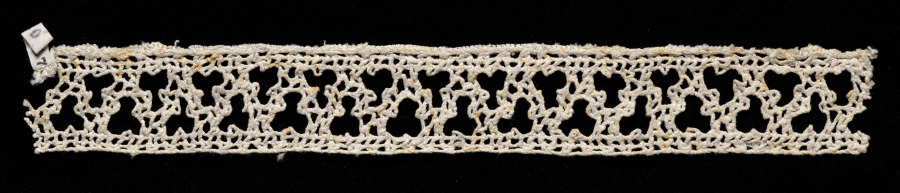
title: Lace Insertion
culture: Italy, Venice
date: 1540–60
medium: Bobbin lace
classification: Lace